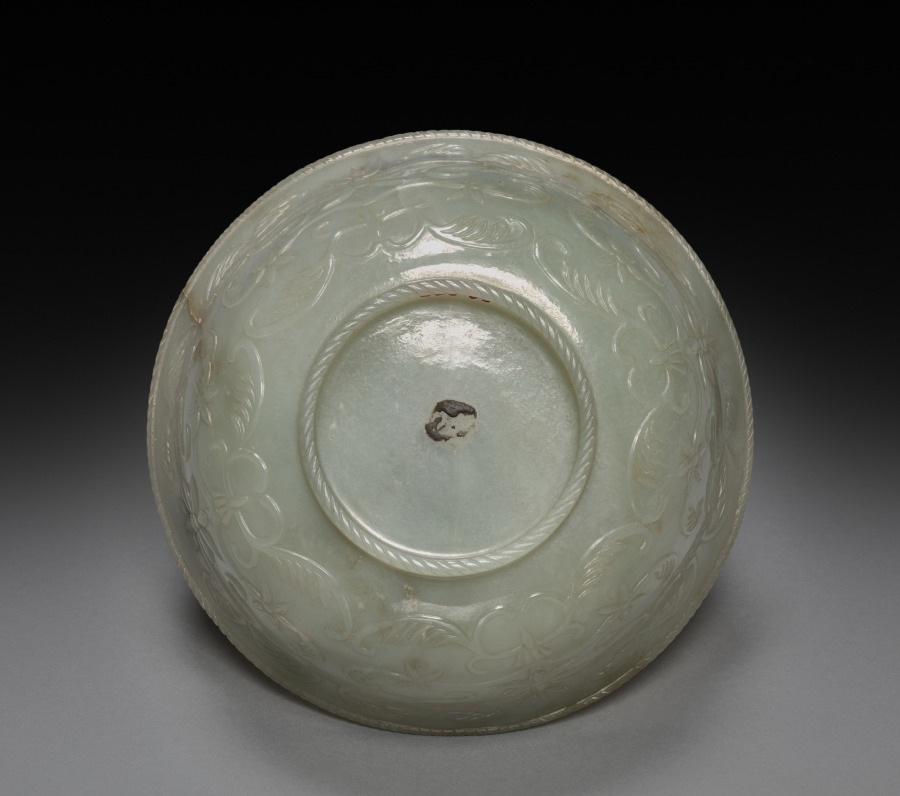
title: Bowl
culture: China, Qing dynasty (1644-1911)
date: 18th Century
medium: jade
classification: Jade